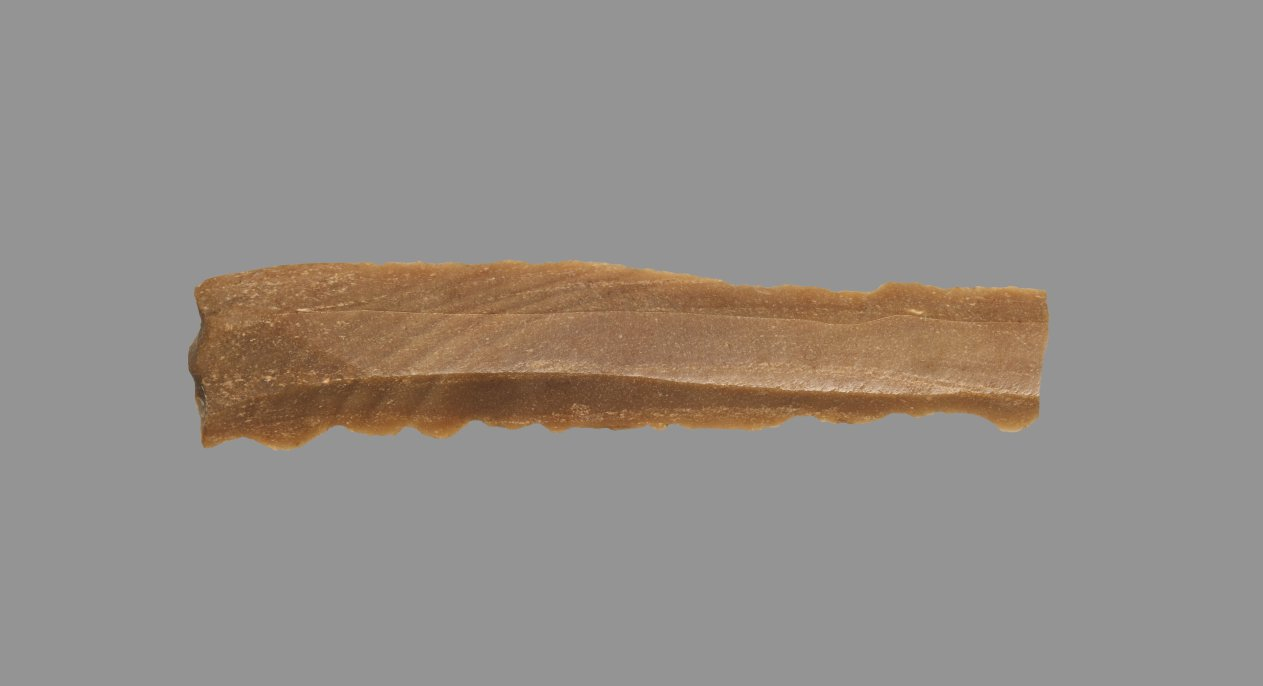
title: Sickle Blade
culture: Egypt, Middle Kingdom (2040–1648 BCE), Dynasty 12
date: 1980–1801 BCE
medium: flint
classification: Implements